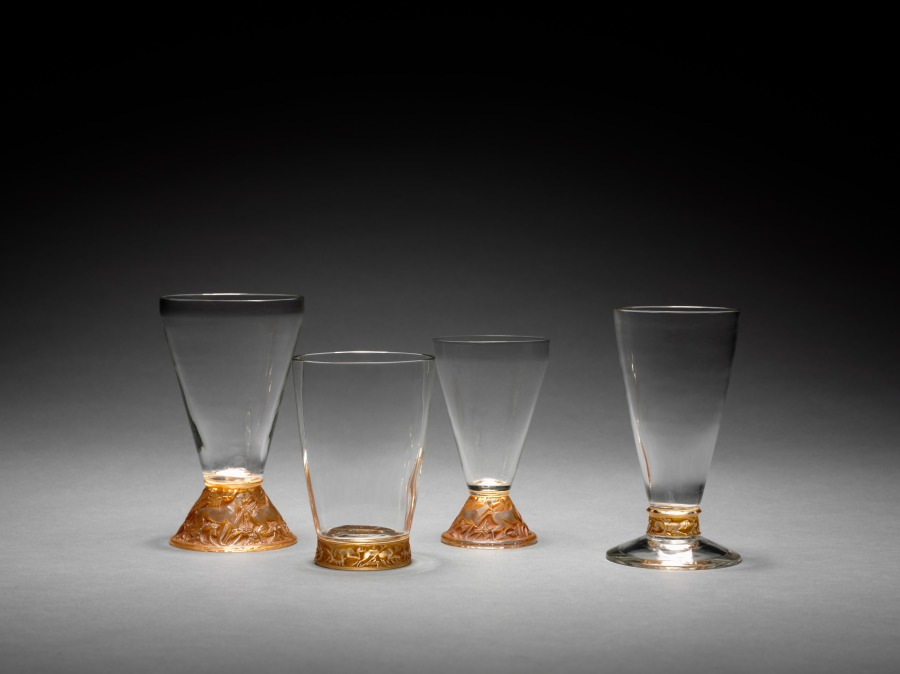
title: Hunting Dogs Footed Red Wine Glass (Verre à pied, chasse chiens)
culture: France, 20th century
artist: René Lalique (French, 1860–1945)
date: c. 1913–21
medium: glass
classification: Glass